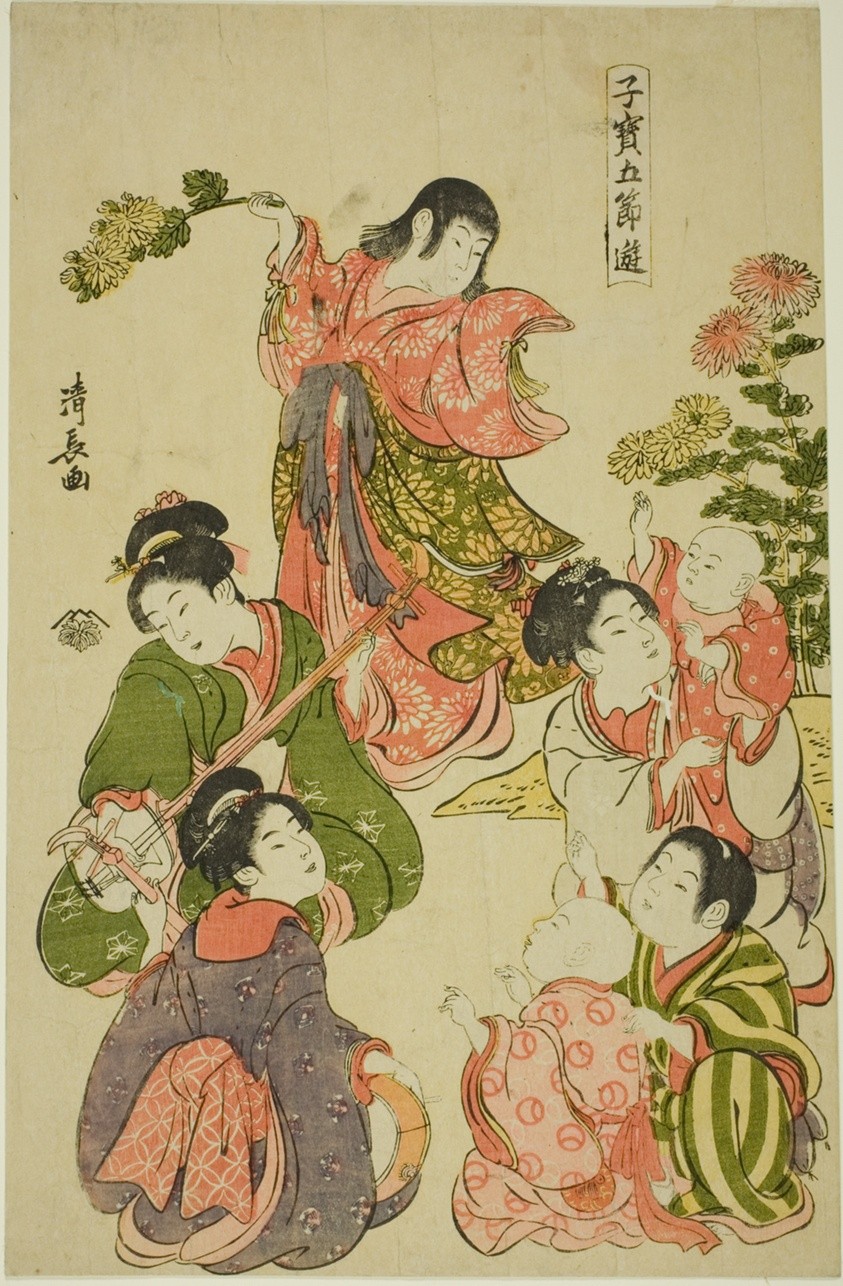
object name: Print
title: Chrysanthemum festival, from the series "Precious Children's Games of the Five Festivals (Kodakara gosetsu asobi)"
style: Japanese (culture or style)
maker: Torii Kiyonaga (Japanese, 1752-1815)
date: c. 1801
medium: Color woodblock print; oban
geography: Japan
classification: woodblock print; print; asian art